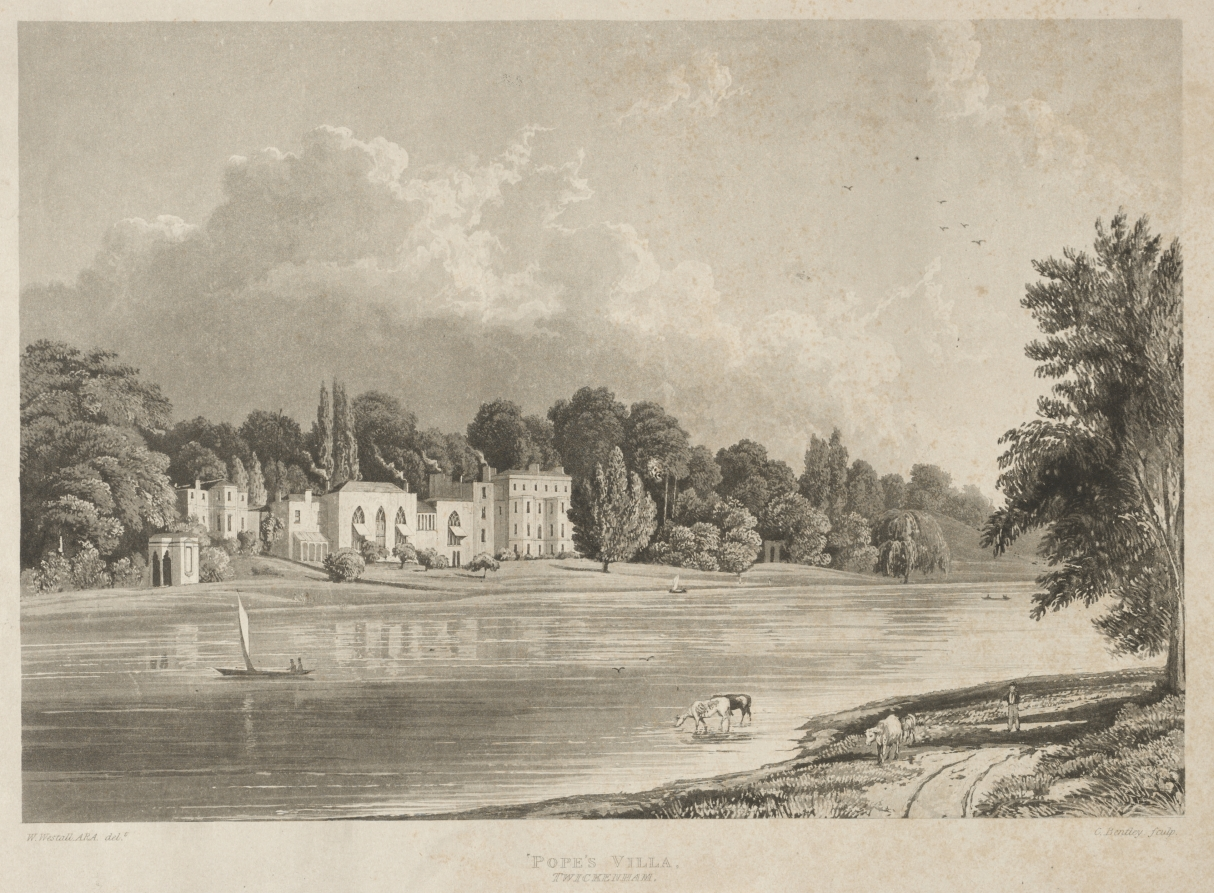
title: Pope's Villa, Twickenham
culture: England, 19th century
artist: Charles Bentley (British, 1808–1854)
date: 1828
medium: aquatint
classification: Print